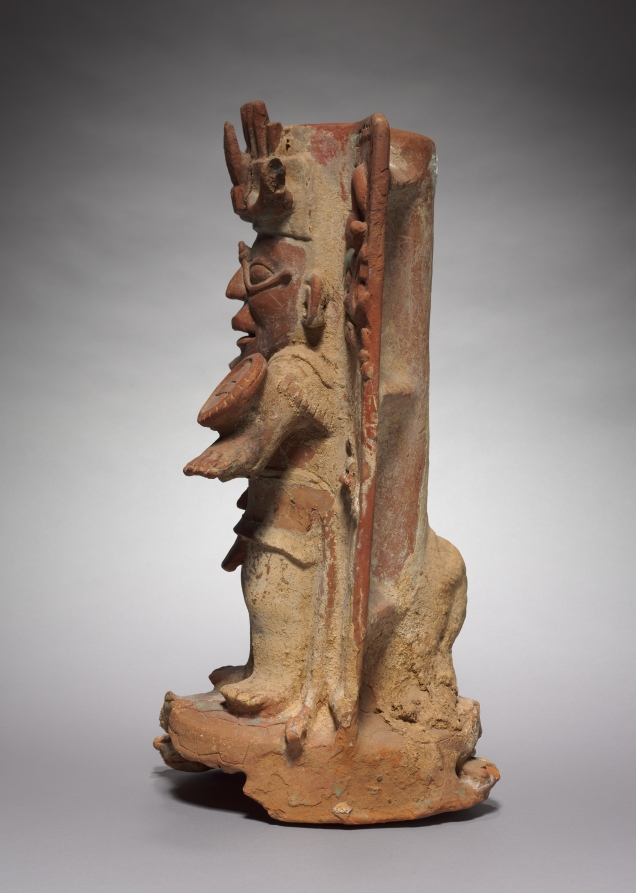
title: Incense Burner Support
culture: Mexico, Chiapas, Palenque Region, Maya, Classic period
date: 600–900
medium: pottery with polychrome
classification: Sculpture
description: This stand, made of a large tube with side panels, originally held a bowl used to ritually burn incense. Modeled on the front is a group that includes the Maya sun deity and two flanking, profile figures in lower relief. All are supported by a turtle, a symbol of the earth and the underworld. Thus, the ensemble may be a model of the cosmos.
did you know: Calcium deposits indicate this incense burner was found in a cave, which the Maya viewed as entrances to the underworld.